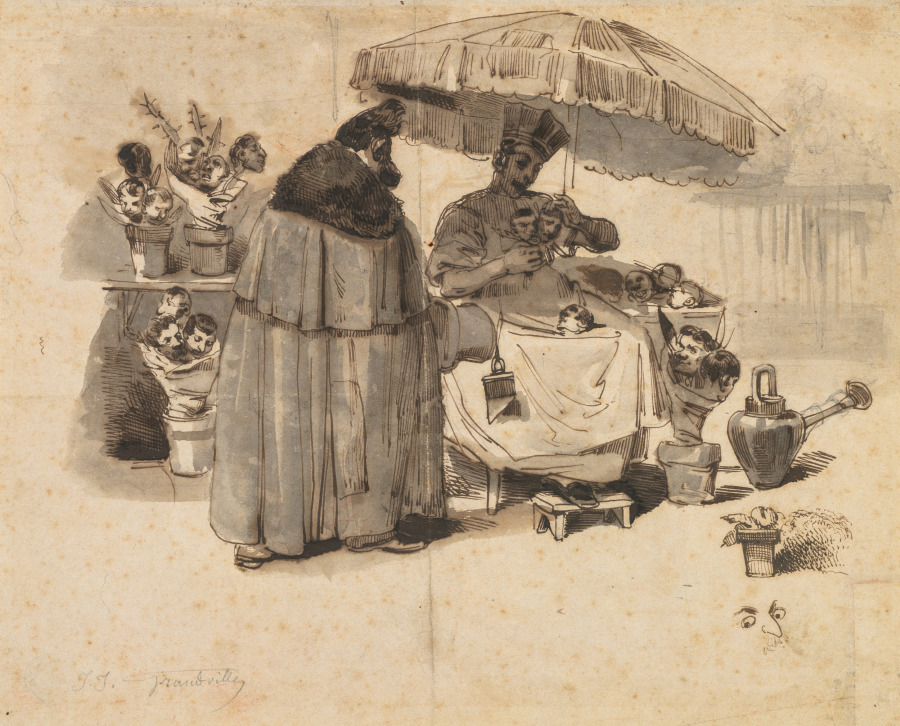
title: Study for "Au Bouquet de persil," (A Bouquet of Parsley)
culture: France, 19th century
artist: Jean-Jacques Grandville (French, 1803–1847)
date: 1833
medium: Pen and black ink with wash and touches of graphite under drawing; verso rubbed with red chalk for transfer to a lithograph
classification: Drawing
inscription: Inscribed, lower left, in graphite: J.J. Grandville Lower right corner verso: Indecipherable collector's mark